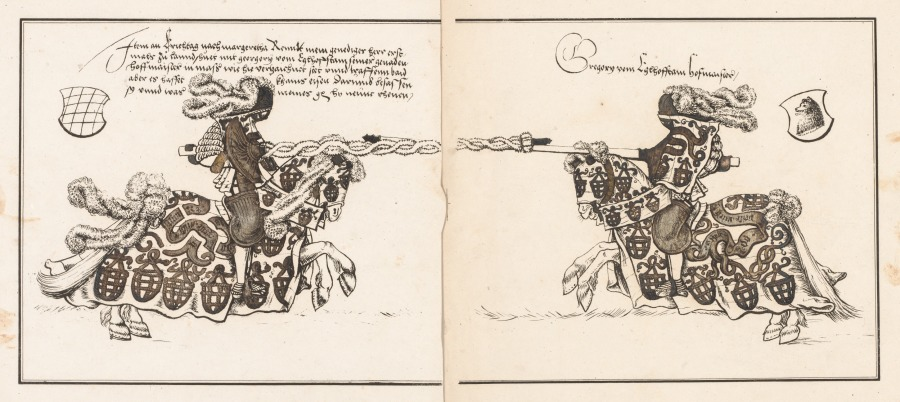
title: Book on Tournaments: Jouster Facing Left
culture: Germany, 19th century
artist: Theobald Senefelder (German, 1777–1846)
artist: and Clemens Senefelder (German, 1778–1813)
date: 1817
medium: lithograph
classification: Print